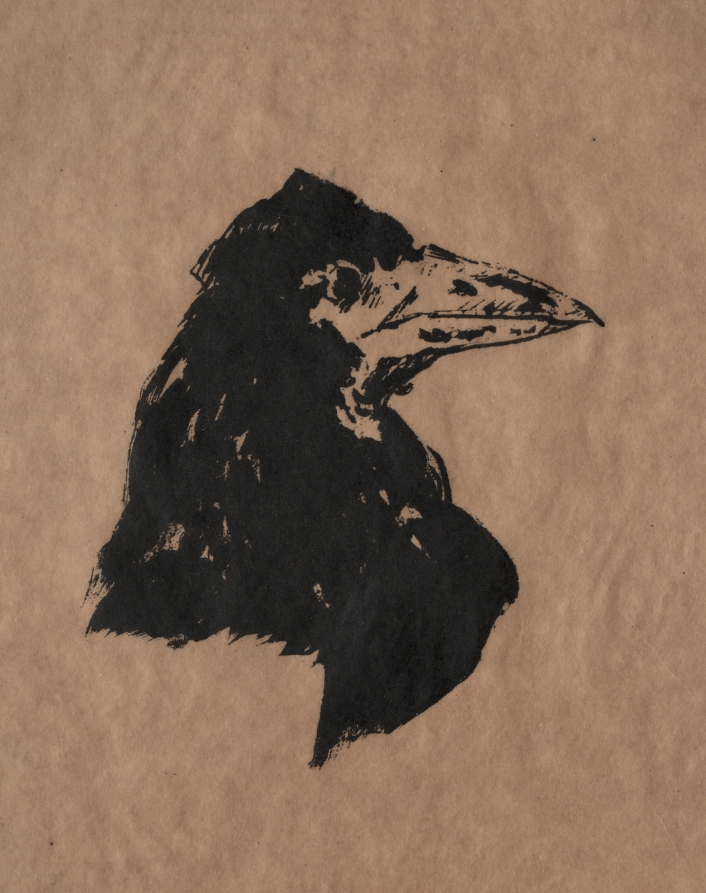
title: Raven's Head in Profile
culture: France, 19th century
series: Illustration for "The Raven" by Edgar Allan Poe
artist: Édouard Manet (French, 1832–1883)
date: 1875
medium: lithograph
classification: Print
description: Edouard Manet created this lithograph for his friend Stephane Mallarmé’s 1875 French translation of American writer Edgar Allan Poe’s classic poem “The Raven” (1845) about a man mourning his deceased love who is visited by a raven that repeatedly cries, “Nevermore.” Mallarmé’s edition is considered one of the first modern livres d’artistes—books created specifically as works of visual art. Manet created four full-page illustrations, including the scene in which the raven stares at the narrator from the top of the bust of the goddess Athena, and a raven head design used on the book’s cover and on its advertising poster.